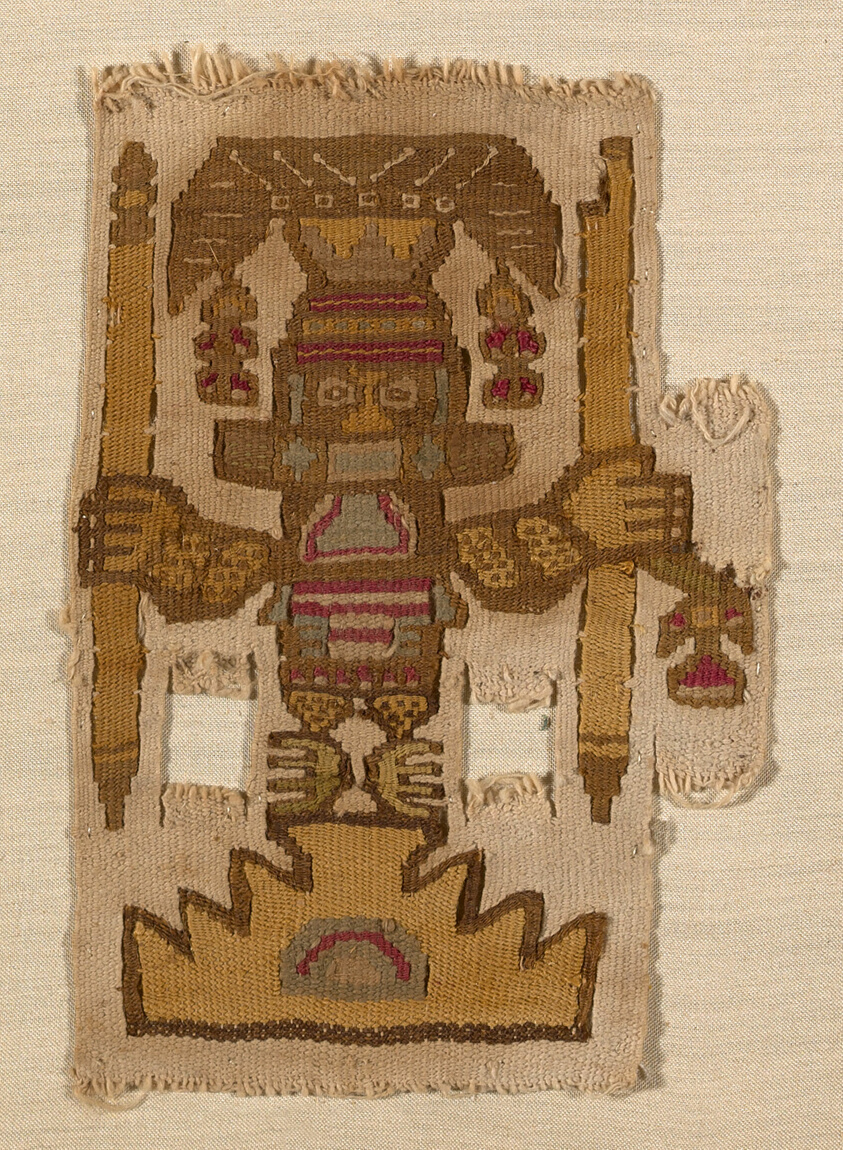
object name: Textile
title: Patch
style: lambayeque, Pre-Columbian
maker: Lambayeque (North coast, Peru)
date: 1000/1476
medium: Cotton and wool (camelid), slit and single interlocking tapestry weave with eccentric and outlining wefts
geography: Peru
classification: textile; weaving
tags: super/natural